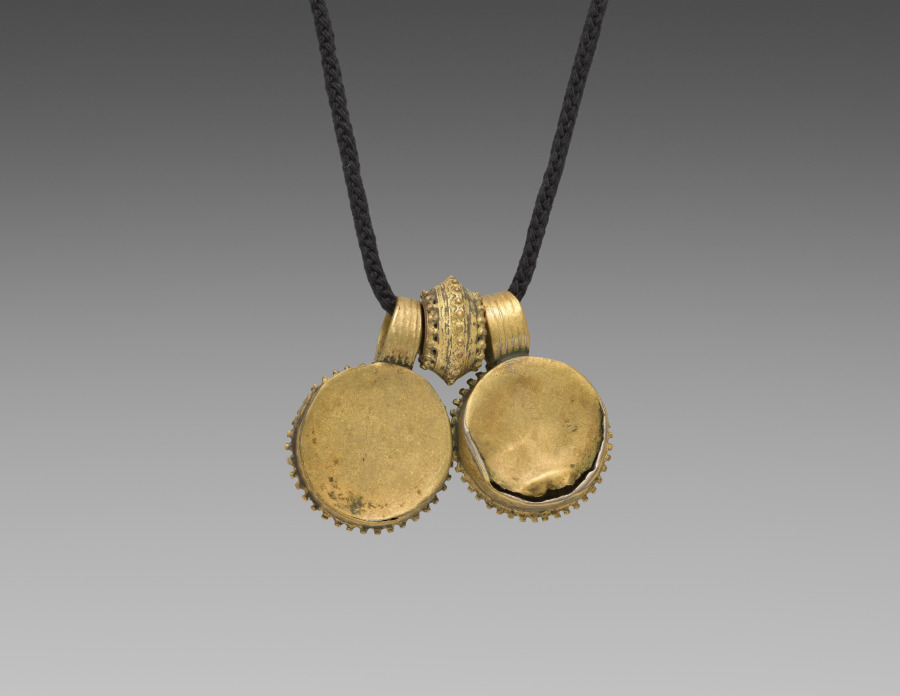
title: Necklace (ashän ketab) with amulet pendants (tälsäm) and bead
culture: Africa, East Africa, Ethiopia, unknown silversmith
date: late 1800s or early 1900s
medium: mercury-gilded copper alloy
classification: Jewelry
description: Ornate filigree jewelry was historically made in Ethiopia for royals and nobility by specialized silversmiths trained through long apprenticeships. This gold-washed silver necklace is composed of numerous box-shaped amulet pendants (tälsäm) meant to ward off the evil eye or other dangers. Linked to Islamic amuletic practices, the boxes are effective whether empty or whether they contain magical or prayerful texts. Their fine filigree and granulation work is characteristic of Harar as well as the Ethiopian Orthodox Christian city of Aksum.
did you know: Gold and silver jewelry has been made in Ethiopia for at least 2000 years.